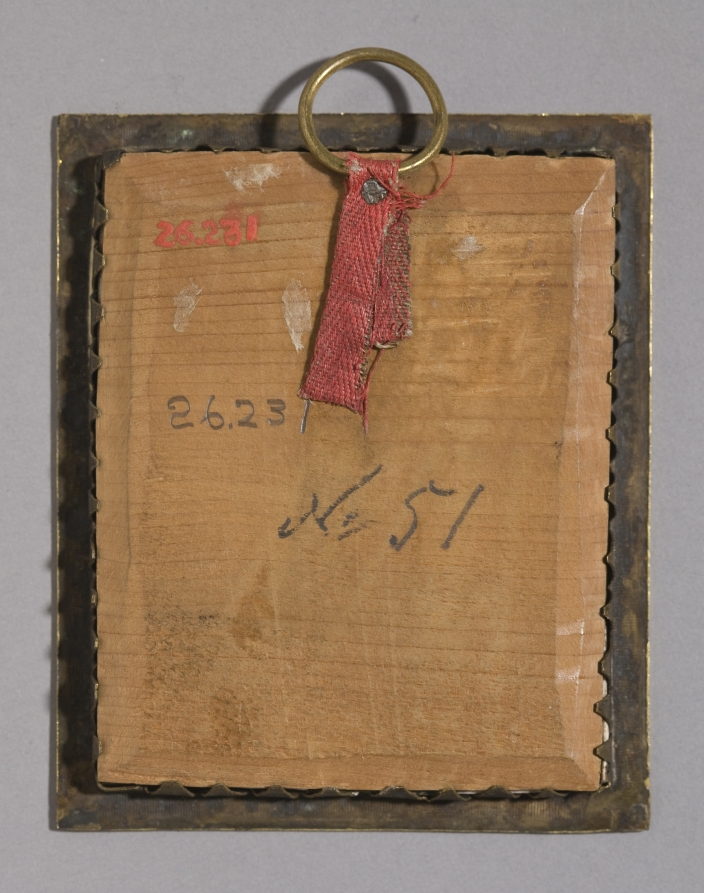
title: Portrait of Baron Ernst Gideon Freiherr von Laudon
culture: Russia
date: 1800s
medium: oil on paper mounted on wood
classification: Portrait Miniature